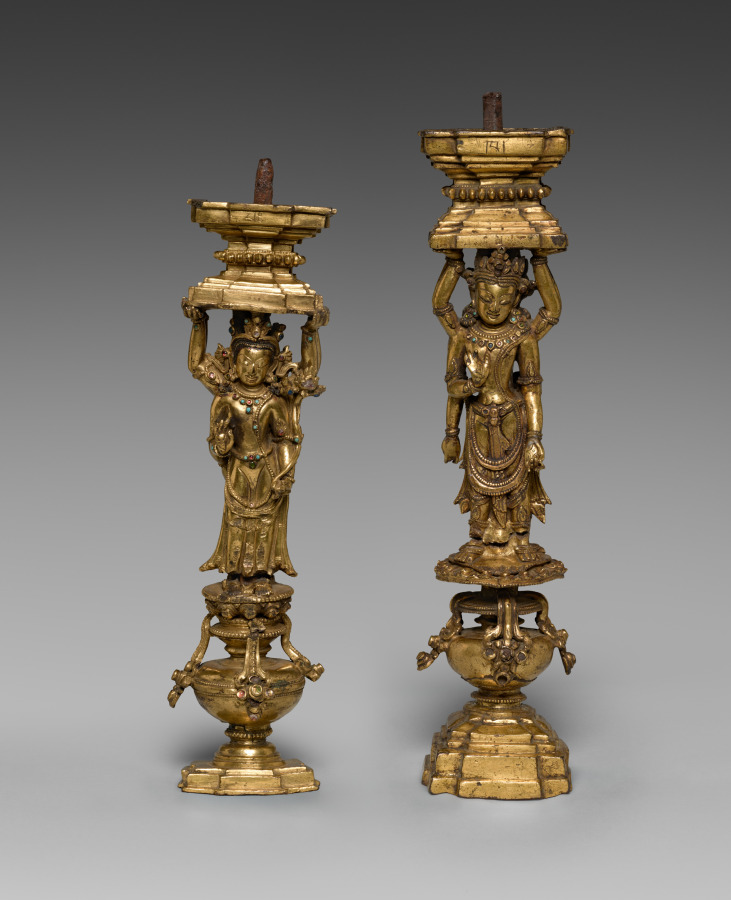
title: Supports with Addorsed Figures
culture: Tibet, Densatil Monastery, 15th century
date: 1400s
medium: gilt bronze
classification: Sculpture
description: These small pillars were part of the multitiered bases of stupas—sacred Buddhist monuments. The figures that faced toward the viewer are four-armed bodhisattvas—beings on the path to perfect enlightenment. The Tibetan syllable carved at the top of the moldings denotes the position where this piece belongs in the series of other small double-sided pillars. The figures on the opposite sides, facing the stupa and unseen by visitors, are figures of four-armed goddesses who make offerings of music or gifts to the stupa. On these examples, one plays a drum; the other holds a lotus. The figures stand on the center of a lotus flower that emerges from an overflowoing pot of abundance. Such imagery indicates that the faithful veneration of this monument will bring productive and abundant good results.